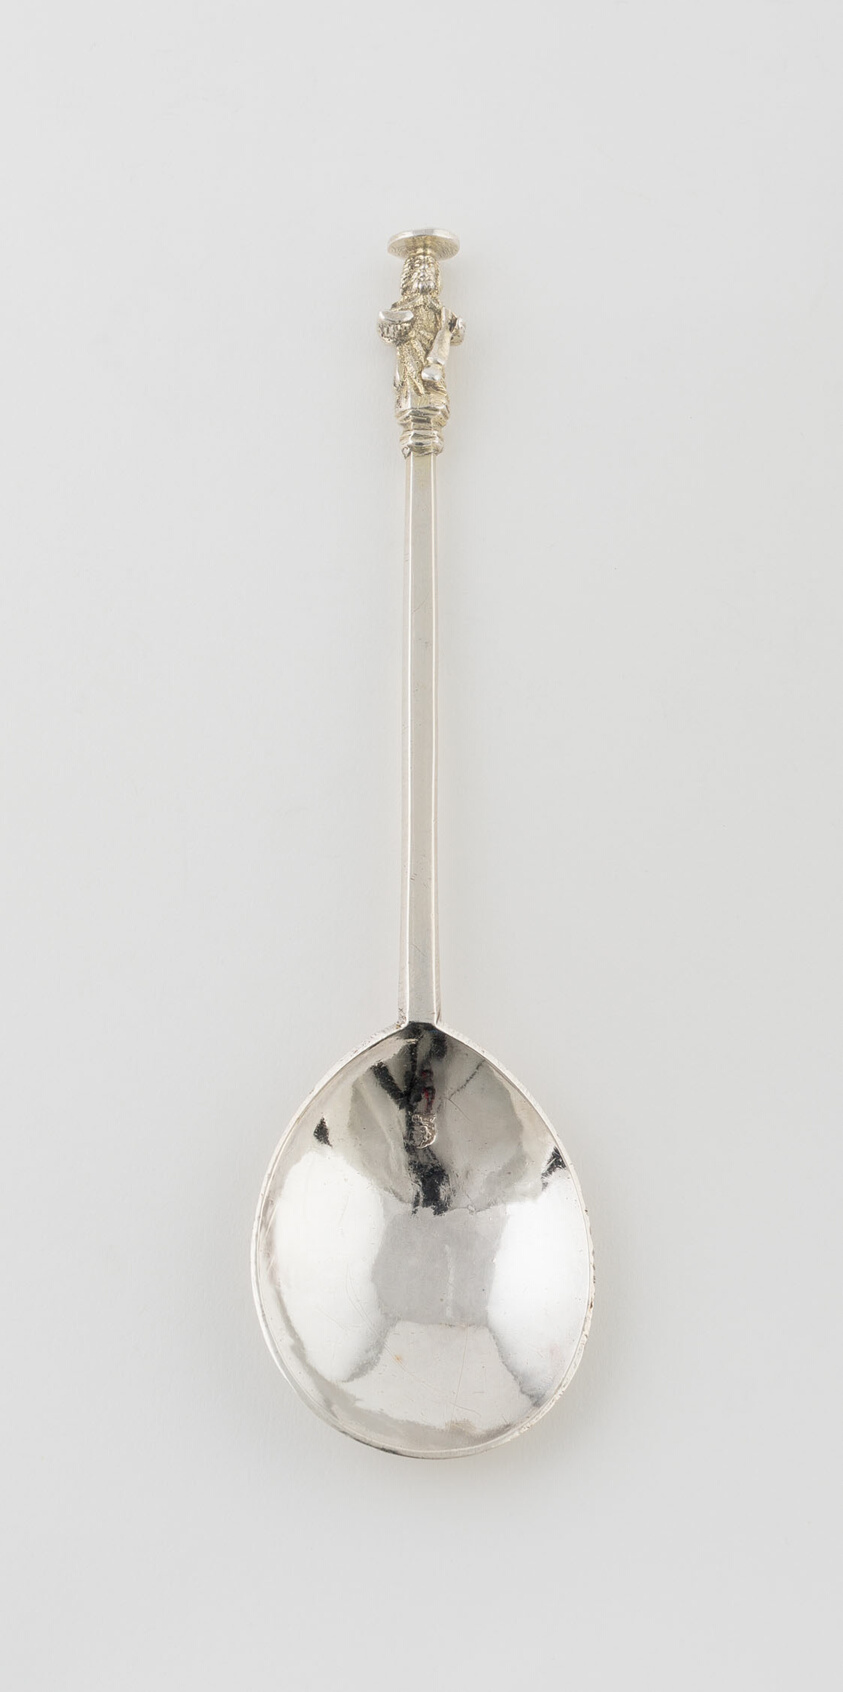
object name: Metalwork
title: Apostle Spoon: St. James the Less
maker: London, England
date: 1640/41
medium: Silver, figure gilded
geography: London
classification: silver; metalwork; european decorative arts